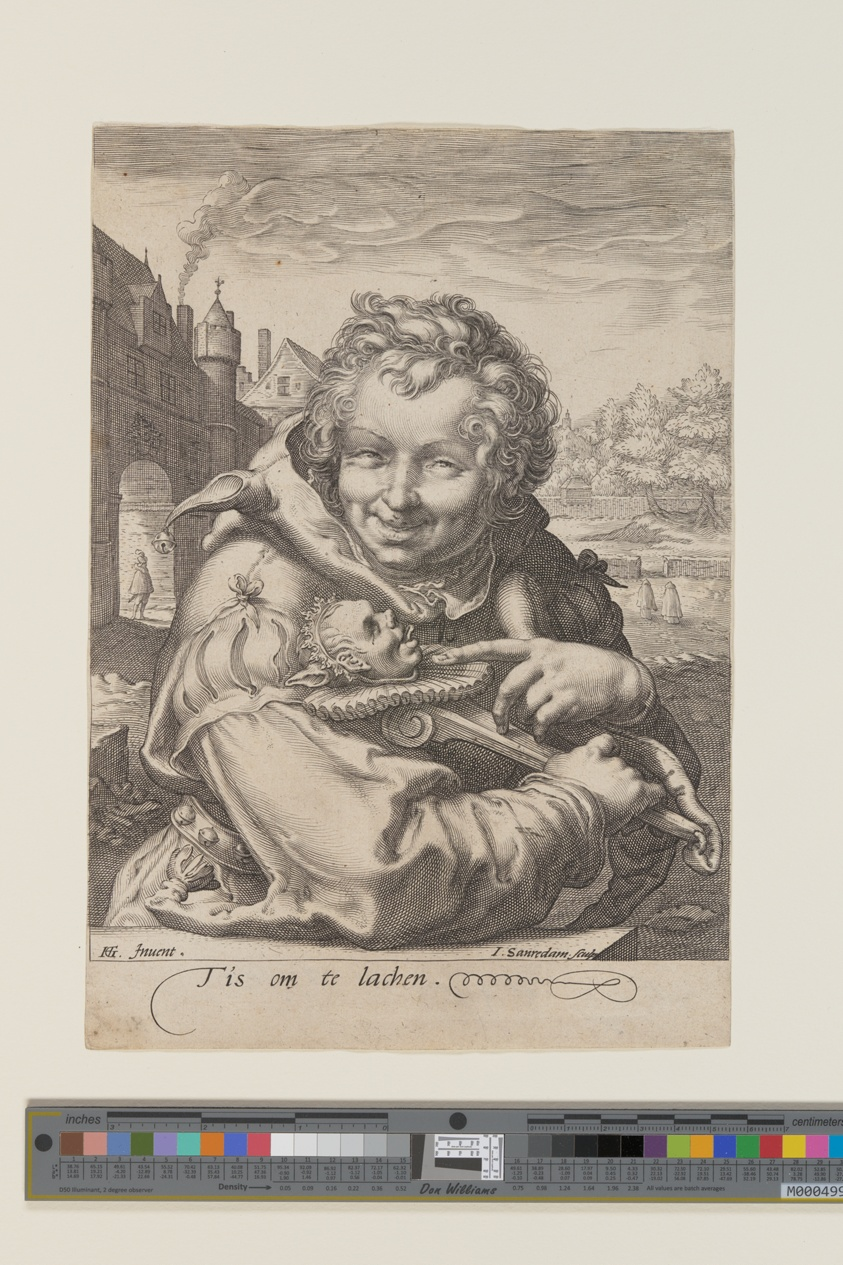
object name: Print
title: Fool Holding a Staff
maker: Jan Saenredam (Dutch, 1565–1607); after Hendrick Goltzius (Dutch, 1558–1617)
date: c. 1595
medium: Engraving on ivory laid paper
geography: Netherlands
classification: engraving; paper; print; prints and drawing